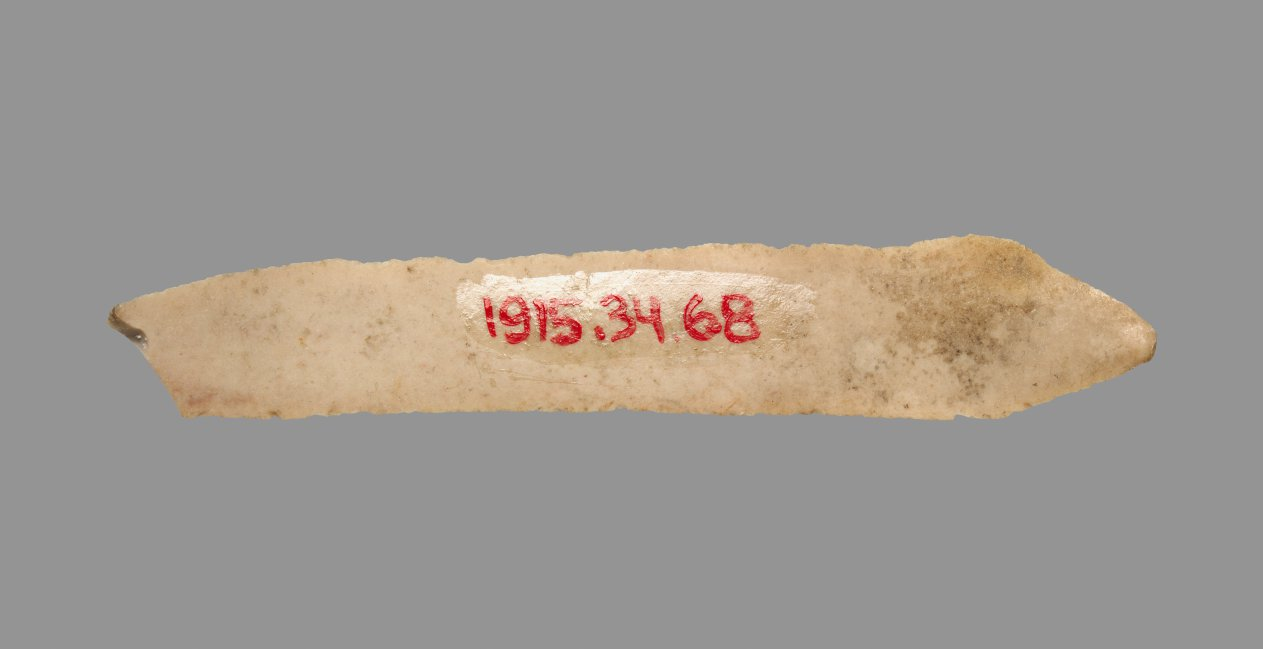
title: Sickle Blade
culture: Egypt, Middle Kingdom (2040–1648 BCE), Dynasty 12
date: 1980–1801 BCE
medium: flint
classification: Implements